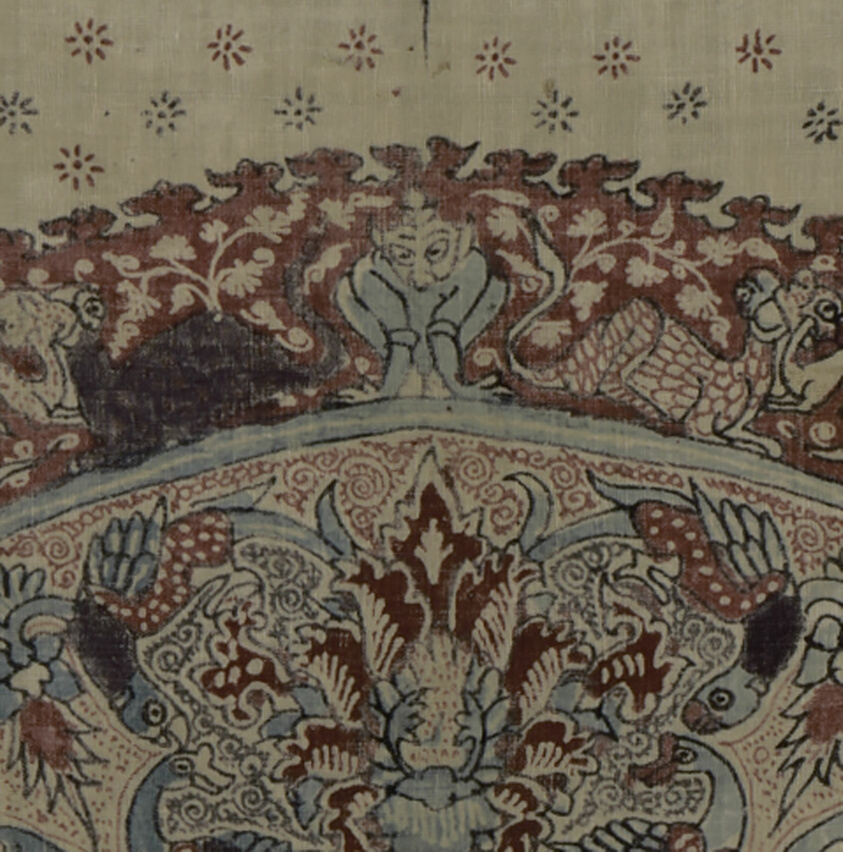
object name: Textile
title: Painted cotton with medallion and figures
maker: Deccan, India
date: 15th century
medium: cotton, plain weave; painted mordant; resist-dyed; painted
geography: India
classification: textile; weaving - printed